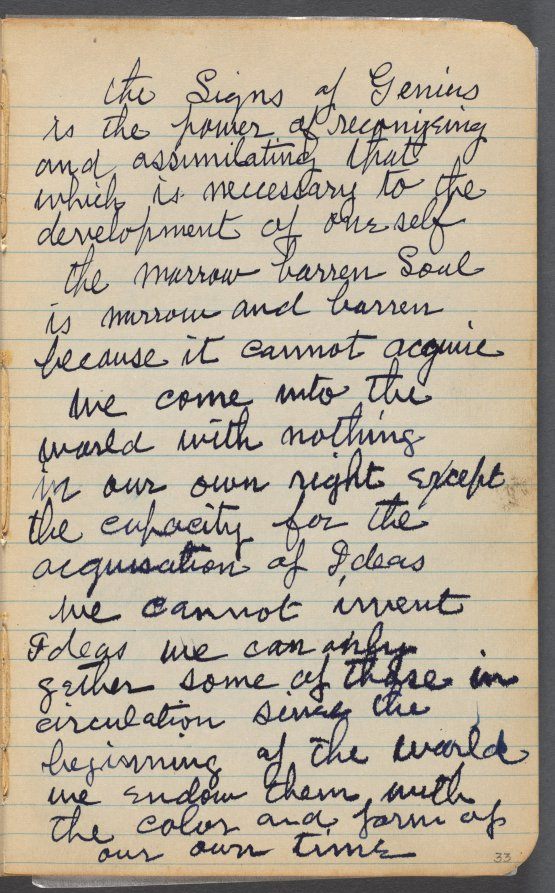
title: Sketchbook, page 033: Notes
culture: America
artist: Maurice Prendergast (American, born Newfoundland [now Canada], 1858–1924)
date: 1905–10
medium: graphite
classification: Bound Volume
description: This sketchbook contains 69 pages of drawings, a diary largely devoted to the state of the artist's health, and a three-page discourse on the nature of genius and ideas.